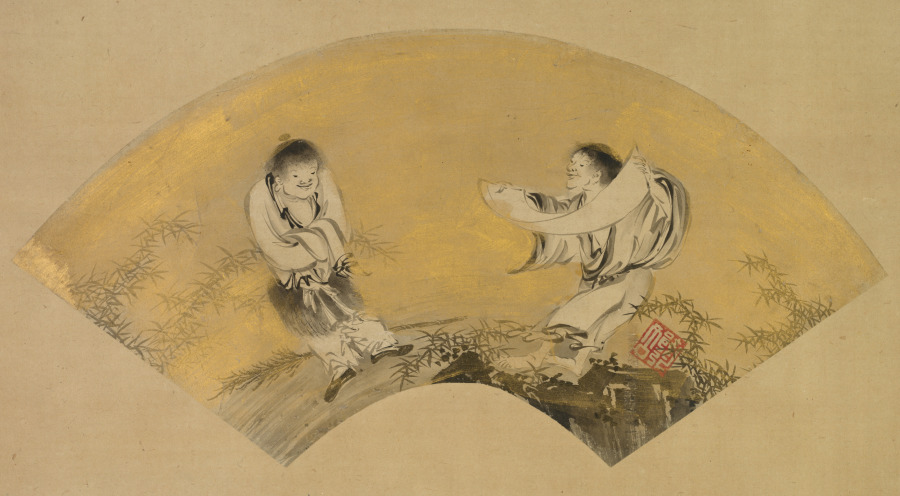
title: Hanshan and Shide (Kanzan and Jittoku)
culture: Japan, Muromachi period (1392–1573)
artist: Shikibu Terutada (Japanese, active mid-1500s)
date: mid-1500s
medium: Fan-shaped painting mounted as hanging scroll; ink and gold on paper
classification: Painting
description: These three fan-shaped paintings, now mounted as individual hanging scrolls, were once part of a set of 20 mounted on a folding screen. They portray the Chinese subjects, from left to right, of the scholar-official Pan Lang, Hanshan reciting his poetry to Shide, and a duck in flight above reeds. Pan Lang grew so fond of the mountain in his place of exile that when he was ordered back to the capital, he rode backward on his donkey so he could see it until it receded into the distance. Hanshan and Shide worked in the kitchen of a Zen monastery, but were actually reincarnations of the bodhisattvas Manjushri and Samantabhadra. The combination of a mandarin duck and reeds may have signified a level of attainment in Chinese civil service exams. All three paintings bear the seal of the Kantobased artist Shikibu Terutada. Shikibu was familiar with Kano school painting, but he also modeled his early style after that of the prominent Kanto-based Kenkō Shōkei (active about 1470–after 1523).